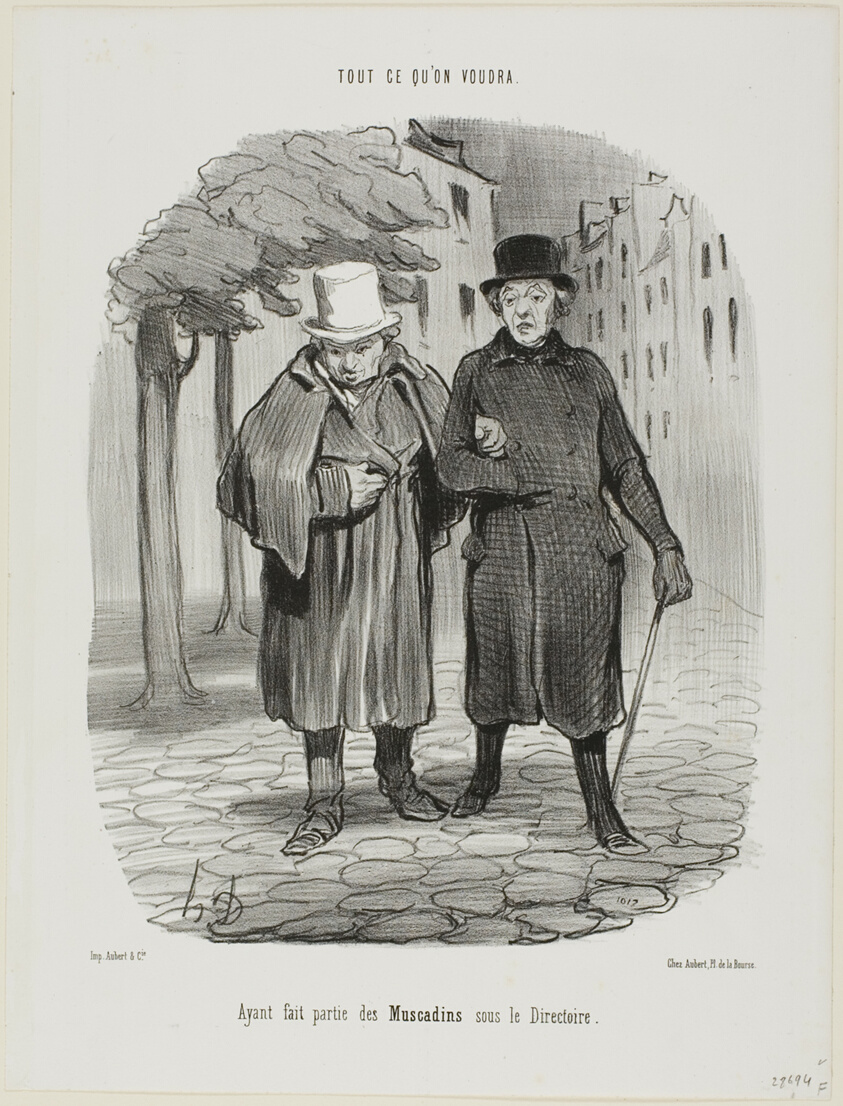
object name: Print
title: Former Dandies from the time of the Directory, plate 7 from Tout Ce Qu'on Voudra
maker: Honoré Victorin Daumier; French, 1808-1879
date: 1847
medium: Lithograph in black on white wove paper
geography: France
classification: lithograph; print; prints and drawing